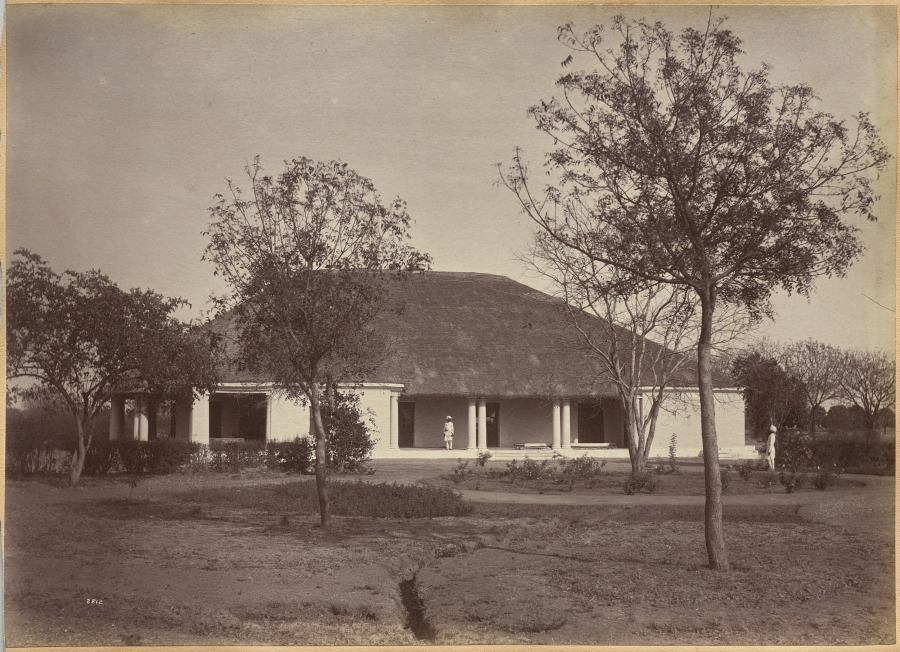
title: Commissioner's house, Jhansi (recto)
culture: India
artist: Raja Deen Dayal (Indian, 1844–1905)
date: c. 1882–87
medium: albumen print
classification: Photograph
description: These photographs are part of an album, now disassembled, of around 105 photographs taken in India between 1885 and summer 1887 that provide glimpses into the lives of the British colonial elite and royal and upper-class Indians. The museum holds another group of 37 pictures from this album (2016.266), which was probably commissioned by a British civil servant visiting or working in India around 1888 as a personal souvenir of his experiences there.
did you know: Raja Deen Dayal is regarded now, and was considered during his lifetime, to be India’s most important 19th-century photographer.